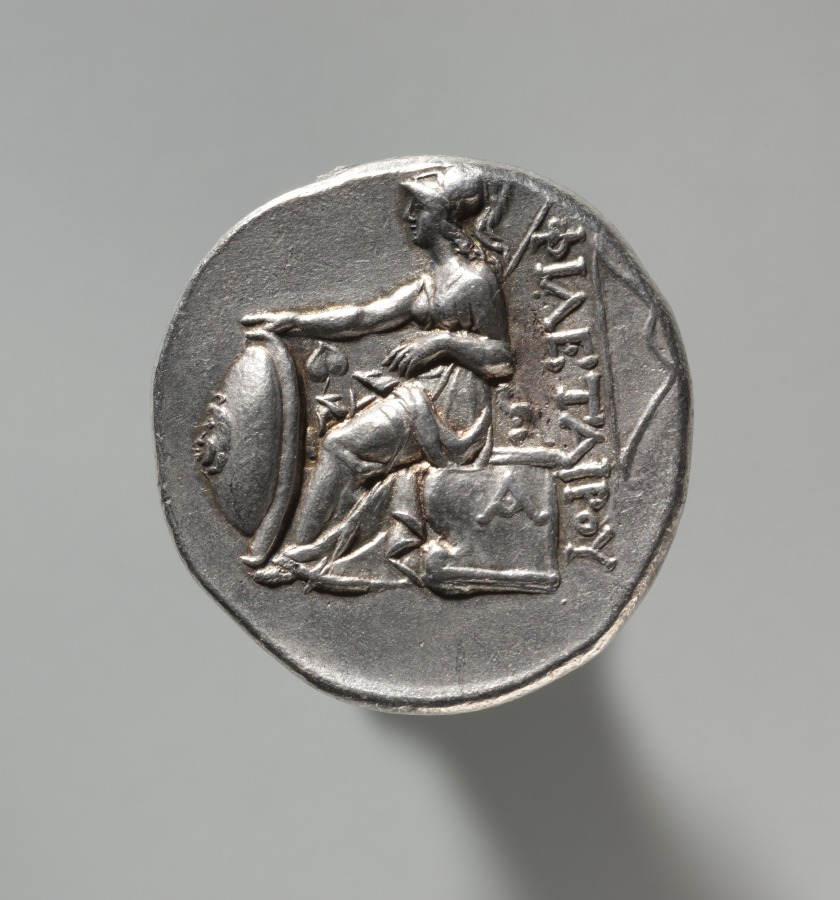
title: Tetradrachm: Head of Philetauros with Laureate Diadem (reverse)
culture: Anatolia, Kingdom of Pergamum (281–133 BCE), Eumenes I (263–241 BCE)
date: 262–241 BCE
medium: silver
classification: Coins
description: The depictions of rulers found on this coin represents a realistic type of portraiture, similar to that found on coins in the West.